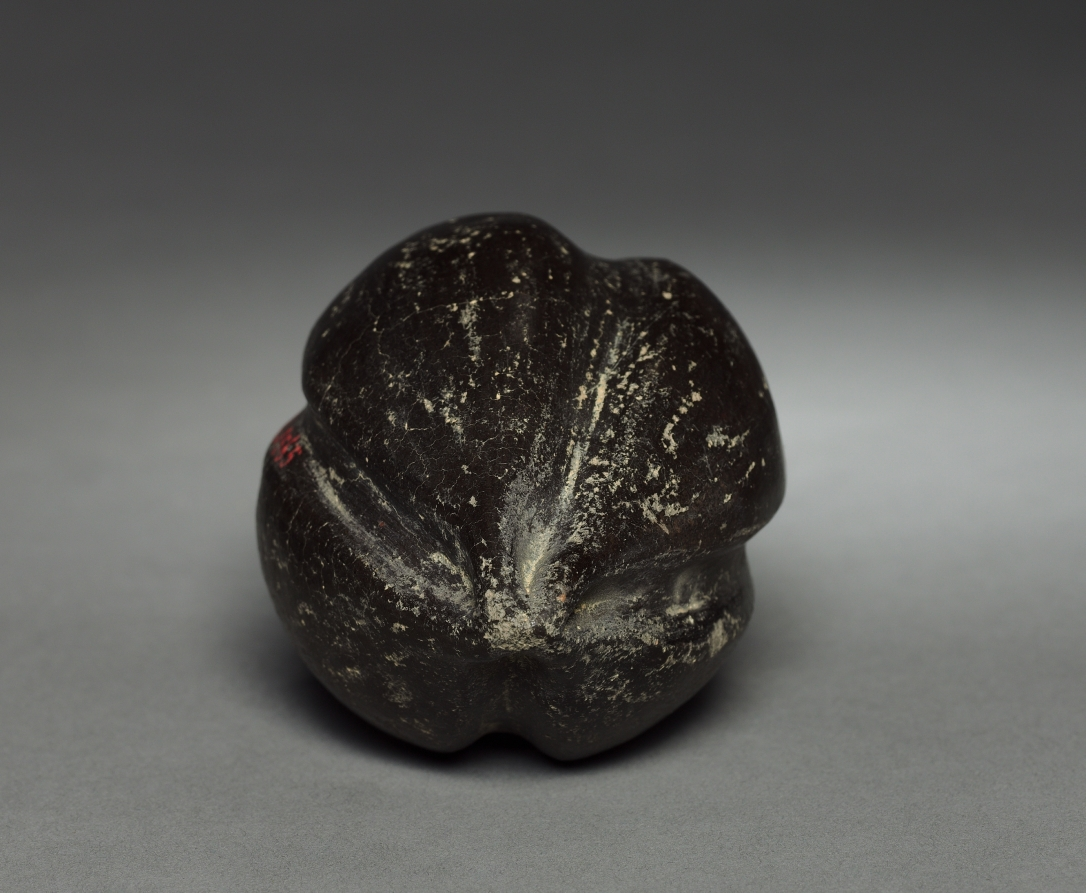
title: Fruit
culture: Colombia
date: before 1921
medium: pottery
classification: Ceramic